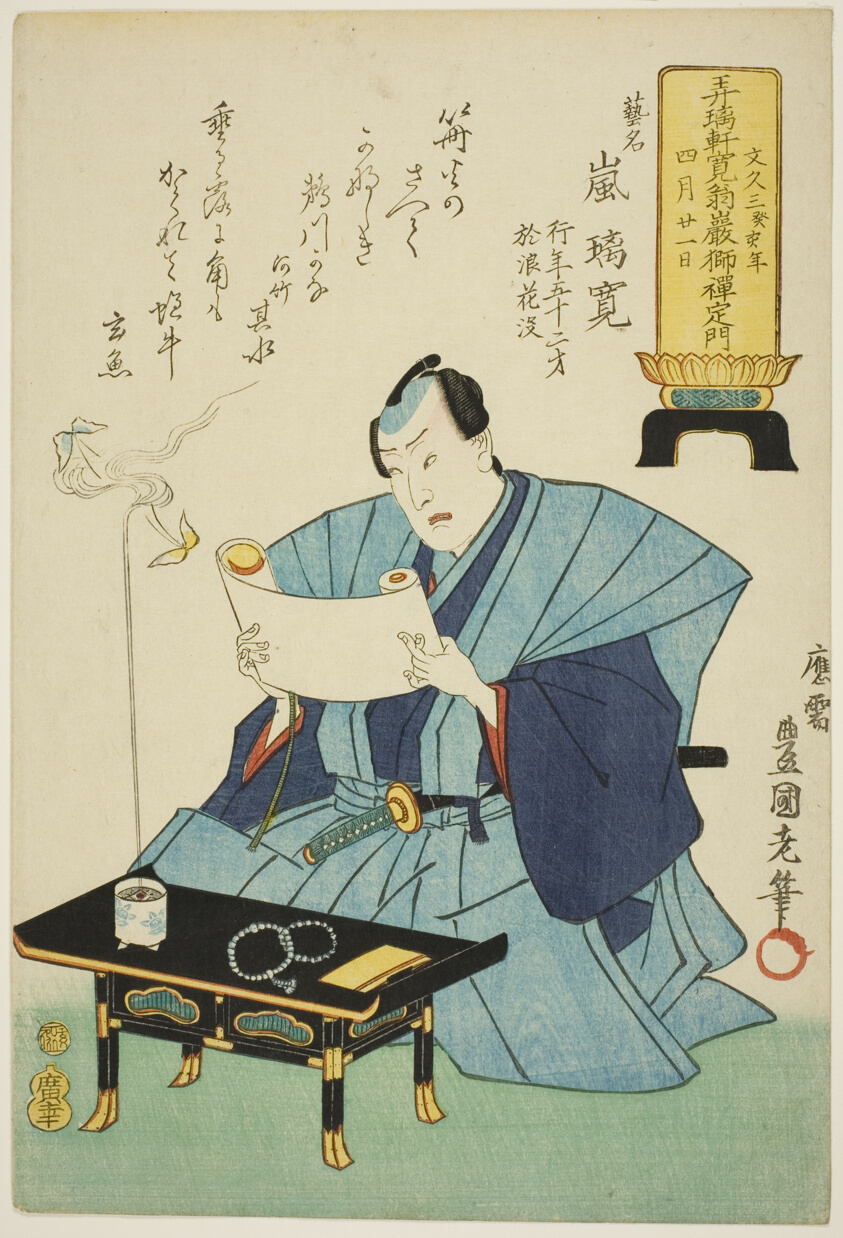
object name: Print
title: Memorial portrait of the actor Arashi Rikan III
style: Japanese (culture or style)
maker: Utagawa Kunisada I (Toyokuni III) (Japanese, 1786-1864)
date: 1863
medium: Color woodblock print; oban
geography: Japan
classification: print; asian art